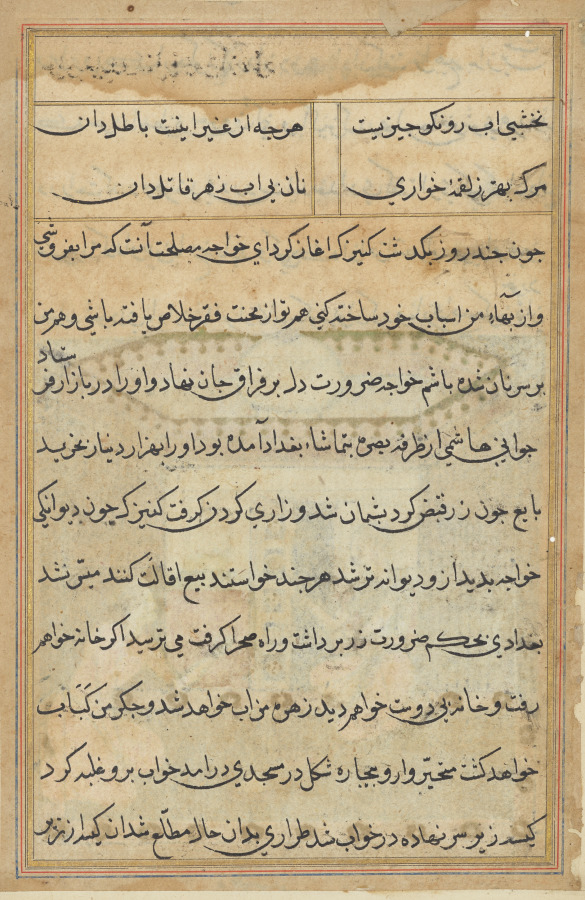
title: Page from Tales of a Parrot (Tuti-nama): text page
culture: Mughal India, court of Akbar (reigned 1556–1605)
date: c. 1560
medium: gum tempera, ink, and gold on paper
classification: Painting